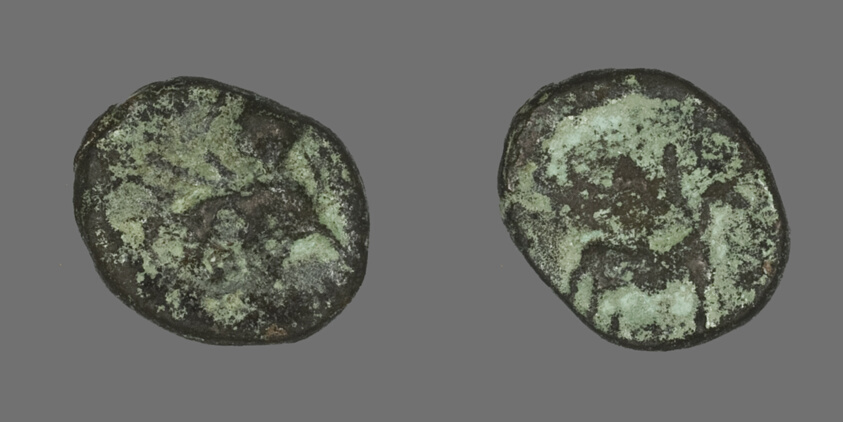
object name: Coin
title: Coin Depicting a Goat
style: greek, ancient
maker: Greek; minted in Paros, Cyclades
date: after 308 BCE ?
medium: Bronze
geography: Ancient Greece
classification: coin; ancient art